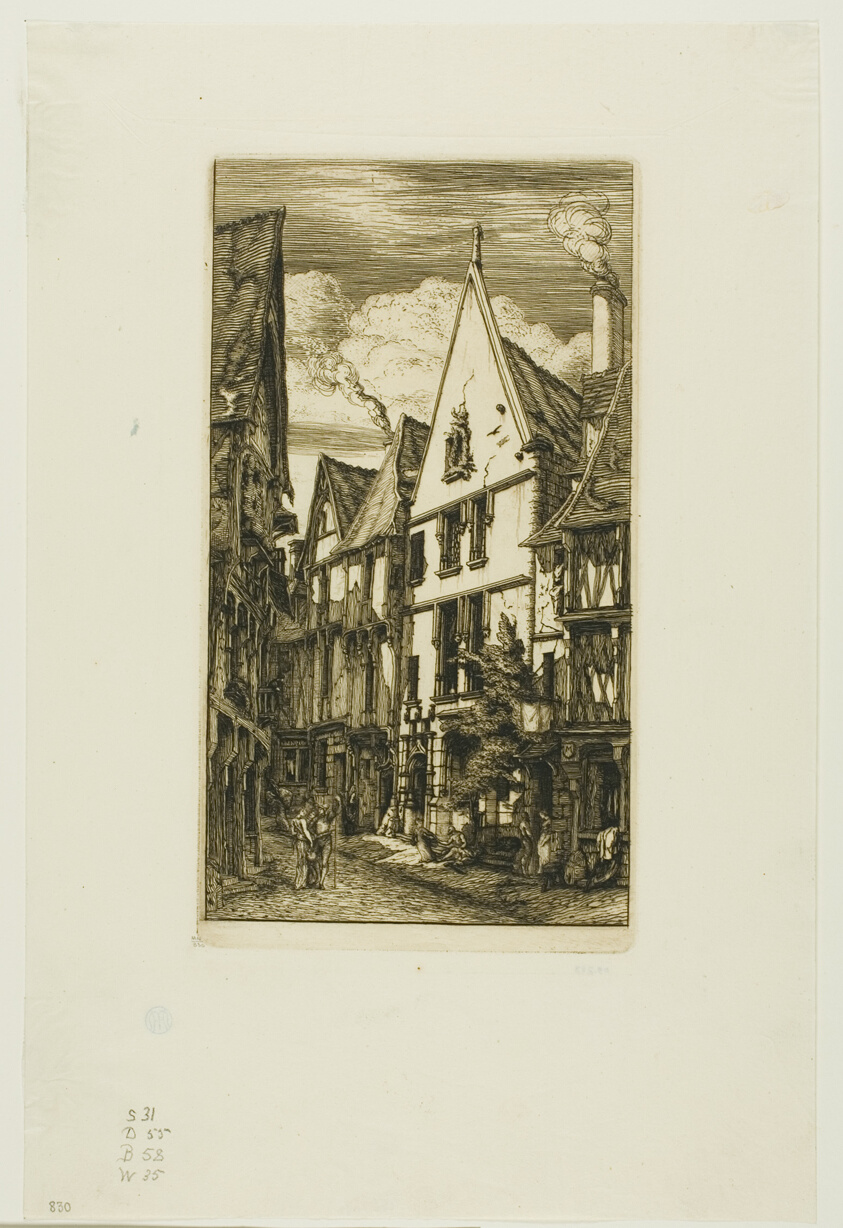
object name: Print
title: Rue des Toiles, Bourges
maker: Charles Meryon (French, 1821-1868)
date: 1853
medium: Etching and drypoint on ivory wove paper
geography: France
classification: etching; print; prints and drawing